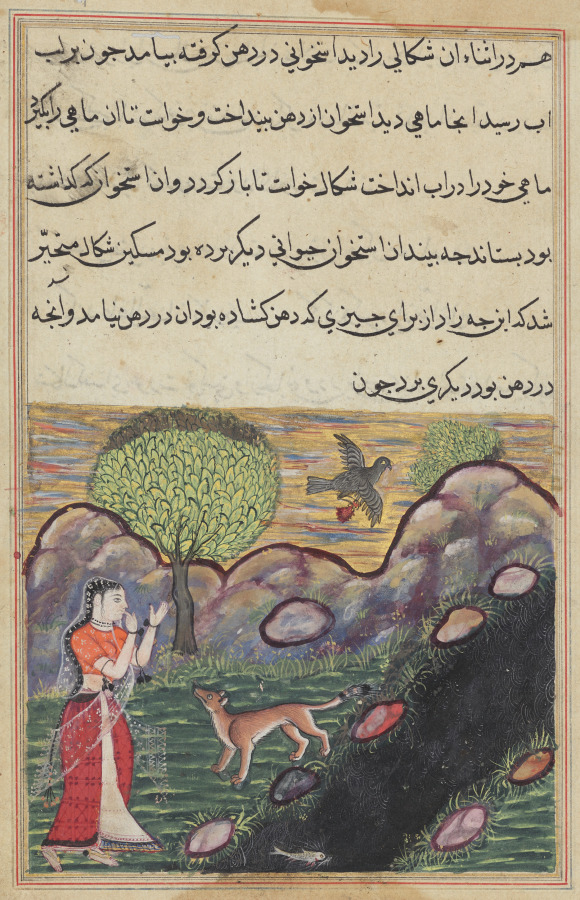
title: The daughter-in-law of the king of Banaras sees the jackal deprived of its food by a bird, as it unsuccessfully attempts to catch a fish, from a Tuti-nama (Tales of a Parrot): Sixteenth Night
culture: Mughal India, court of Akbar (reigned 1556–1605)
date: c. 1560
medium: gum tempera, ink, and gold on paper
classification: Painting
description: Having been left alone in the wilderness by her lover, the woman comes across the jackal who has just lost its meal. The wise jackal counsels her on the importance of satisfaction and instructs her to return to her husband. Above them, a large bird flies away with the jackal’s food gripped in its feet.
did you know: The fish that the jackal was trying to catch is visible in the stream.